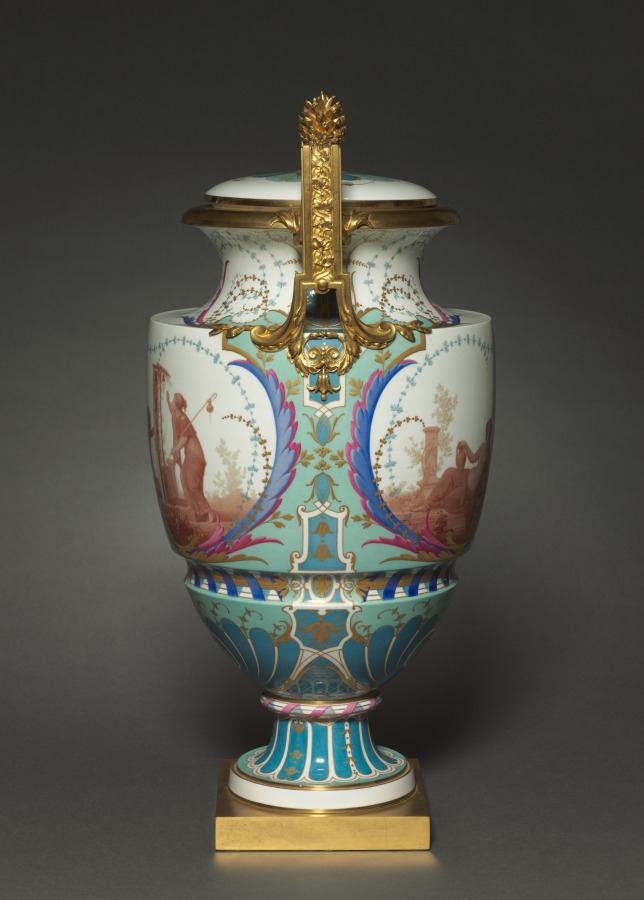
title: Vase Feuille d'Eau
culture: France, Sèvres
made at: Sèvres Porcelain Factory (French, est. 1756)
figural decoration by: Paul Marie Roussel (French, 1804–1877)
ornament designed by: Emile Renard (French)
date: 1858–62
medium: porcelain with gilt bronze mounts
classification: Ceramic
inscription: figural paintings signed obverse and reverse: "PMROUSSEL INV & PIN"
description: Feuille d'Eau means "waterleaf" and refers to the name given to the shape of this vase at the Sèvres factory. In English, waterleaf is the common name for a plant with bell-shaped flowers. The term is also applied to a stylized plant motif used in Graeco-Roman ornament. This vase was exhibited by the Sèvres firm at the International Exhibition held in London in 1862.